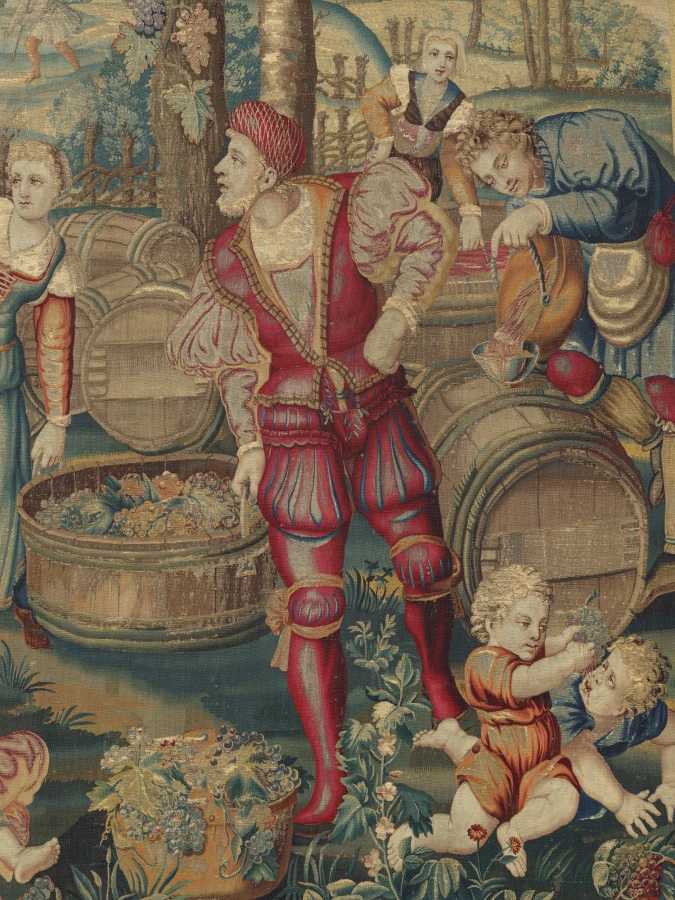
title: Autumn: Vintage Scene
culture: France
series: Four Seasons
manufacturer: possibly by Gobelins Manufactory (France, Paris, est. 1662)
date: designed c. 1535, woven mid- to late 1600s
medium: Wool, silk, and gold filé: tapestry weave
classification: Tapestry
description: In 16th-century Europe, the grape harvest took place in autumn, a tradition that persists among vintners to this day. Here, men and women gather grapes in buckets and drop them into an enormous wood vat. Two men stomp on the ripe grapes, squeezing out the juice. A man on the far right pours the juice into barrels, where it will ferment into wine. Children sleep or play in the foreground; one mischievous toddler presses grape juice into the mouth of another small child. In the distance four couples dance to music provided by a bagpiper, who is perched in a tree.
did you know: Originally green, the plants were woven using yarn first dyed blue and then dyed yellow; over time the yellow dye has faded so that today the plants appear blue.